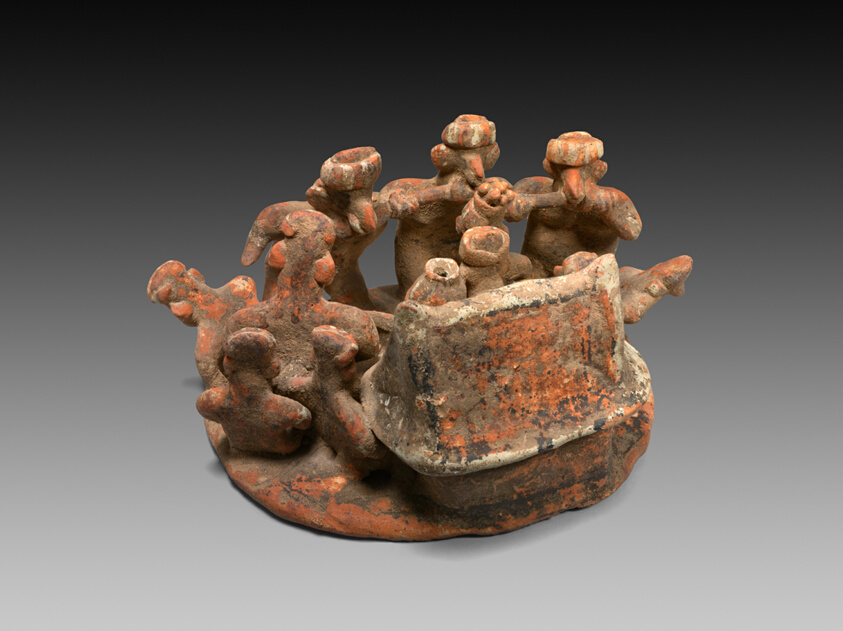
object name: Sculpture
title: Funerary Cheek-Piercing Ritual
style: nayarit, mesoamerican, Pre-Columbian, americas, west mexico, ixtlán del rio, Arts of the Americas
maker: Nayarit (Ixtlán del Río, Nayarit, Mexico)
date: 200 BCE–300 CE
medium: Ceramic and pigment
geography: Nayarit state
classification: earthenware; art of the americas; ceramics; sculpture; funerary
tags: people, communities, funerary art, temple, dancers, ritual, houses